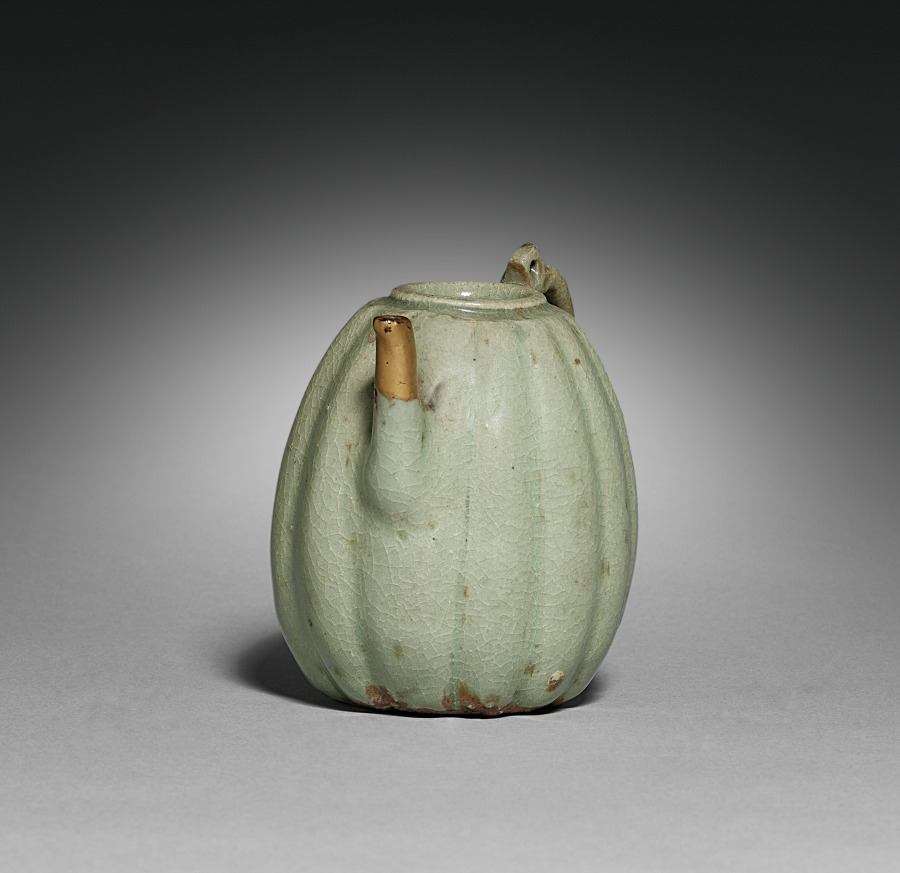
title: Melon-shaped Wine Ewer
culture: Korea, Goryeo dynasty (918–1392)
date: 1100s-1200s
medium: celadon ware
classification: Ceramic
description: Many celadon ceramics, such as these two miniature pots, have been repaired with gold lacquer. Termed kintsugi (literally meaning “gold joinery”) in Japanese, this restoration method highlights broken parts with glittering gold mixed with lacquer. Initiated in 15th-century Japan, the technique follows a popular aesthetic concept called wabi-sabi, which finds beauty in imperfect things. Goryeo celadons were considered rare treasures among early 20th-century Japanese collectors; thus, their broken condition is brilliantly highlighted in gold lacquer, as seen here in the repaired spouts, handle, and lid.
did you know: This miniature wine pot was buried in a tomb for the soul of the deceased.